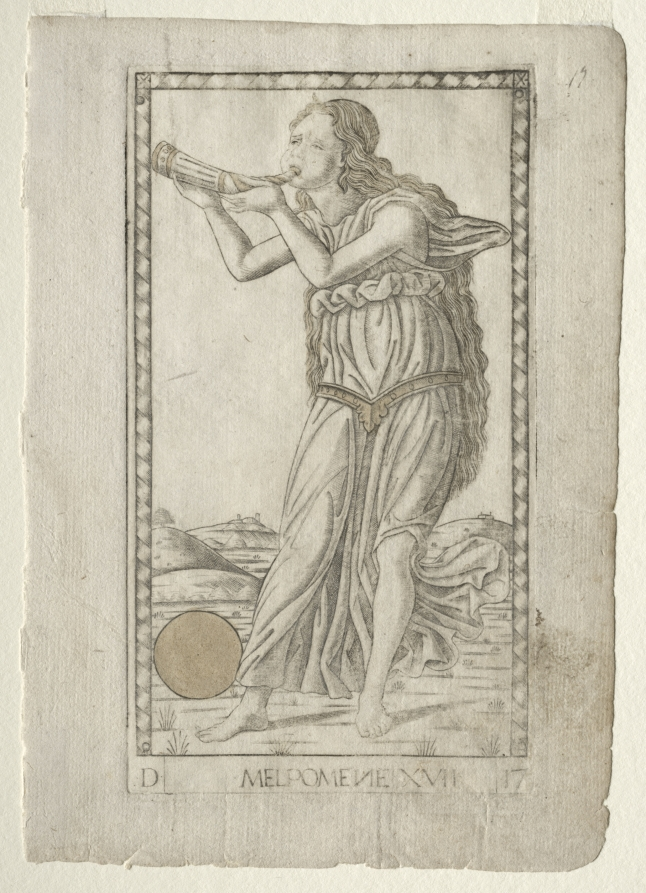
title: Melpomene (tragedy) (from the Tarocchi series D: Apollo and the Muses, #17)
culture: Italy, Ferrara, 15th century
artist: Master of the E-Series Tarocchi (Italian, active 1460s)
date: before 1467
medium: engraving hand-colored with gold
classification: Print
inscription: Lettered below the image of Melpomene: ·D· / ·MELPOMENE XVII· / ·17·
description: This engraving is part of the Tarocchi group marked with the letter “D,” and named Apollo and the Muses. In Greek mythology, the nine Muses (Calliope, Urania, Terpsichore, Erato, Polyhymnia, Thalia, Melpomene, Euterpe, and Clio) were the daughters of Zeus, king of the gods, and Mnemosyne, the Titaness of memory. The Muses were goddesses presiding over different branches of the arts and sciences. Their leader and supervisor was Apollo, the god of light, music, prophecy, and poetry. Here, Melpomene is personified as a full-length female figure, turned to left, and set in an imaginary hilly landscape. She is blowing a horn. Melpomene was regarded as the Muse of tragedy.